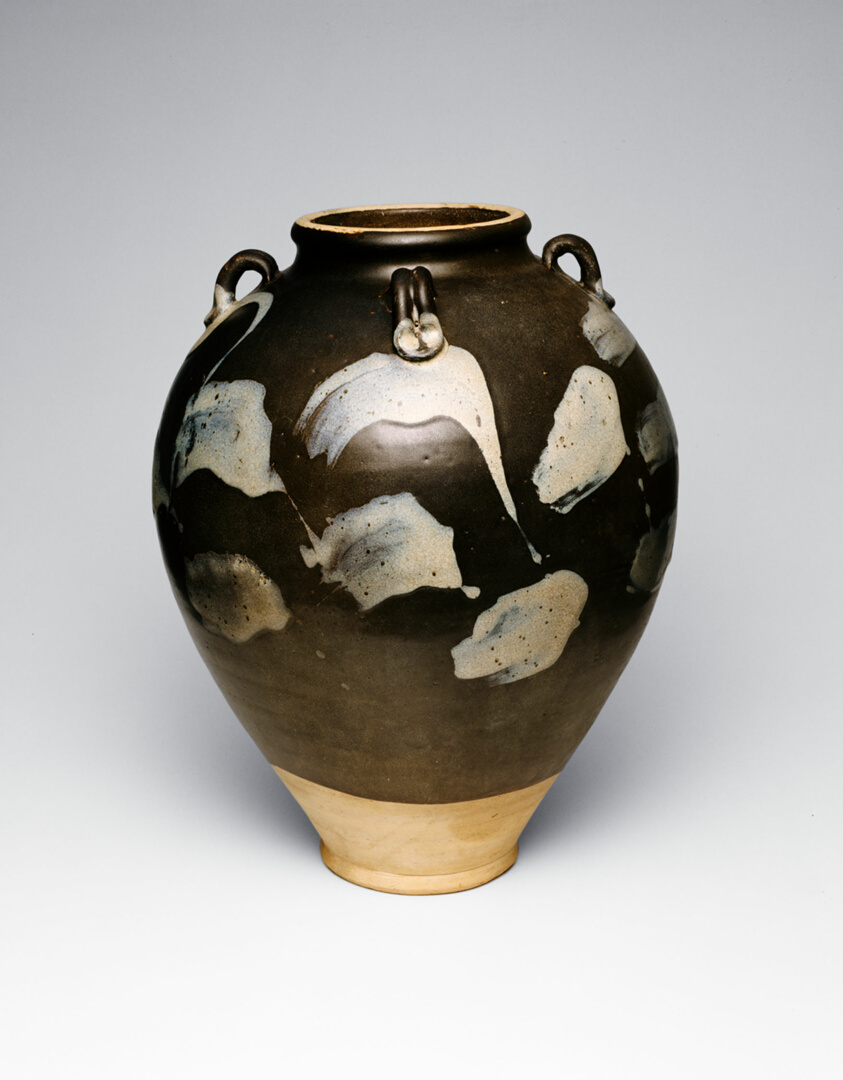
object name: Vessel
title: Ovoid Jar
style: Chinese (culture or style)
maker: China, probably Henan province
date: Tang dynasty (618–907), 8th/9th century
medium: Lushan ware; stoneware with iron-brown and splashed milky-blue ash glazes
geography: China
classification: stoneware; ceramics; asian art; vessel